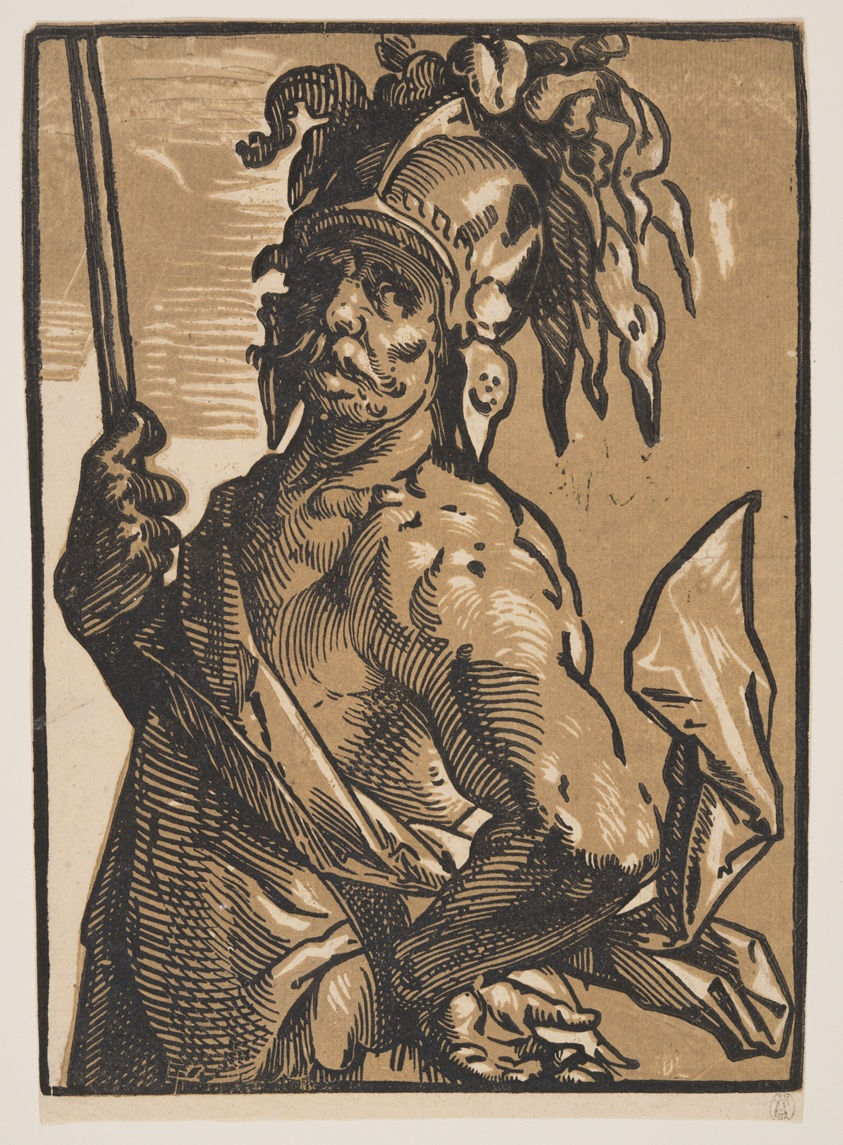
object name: Print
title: Mars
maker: Hendrick Goltzius (Dutch, 1558-1617)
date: c. 1588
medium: Chiaroscuro woodcut from two blocks in tan on ivory laid paper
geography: Netherlands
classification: print; paper; prints and drawing; woodcut